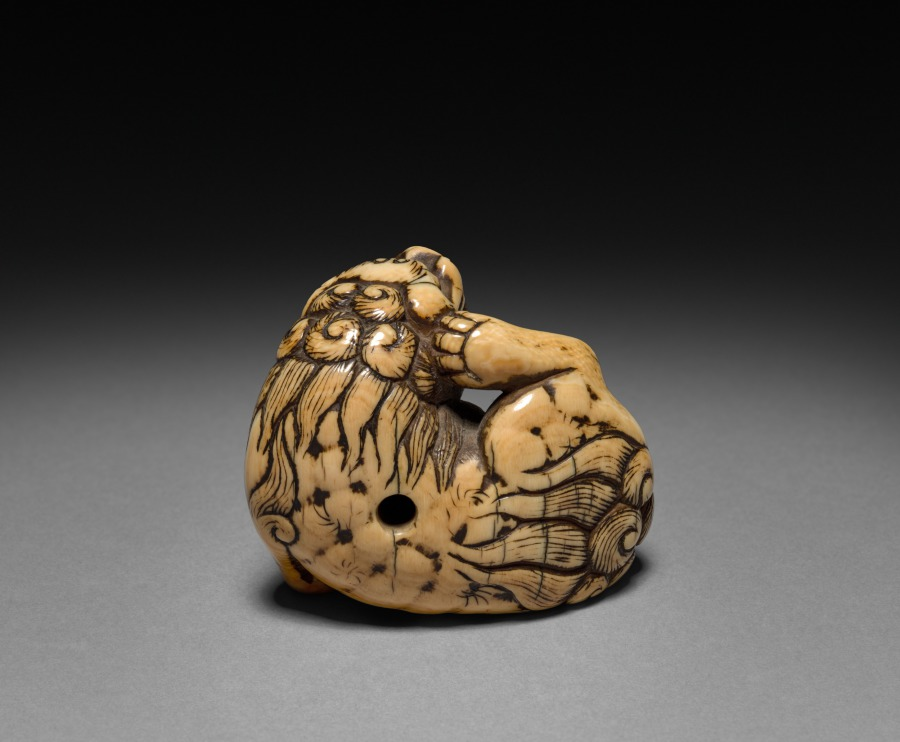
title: Chinese Lion with Ball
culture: Japan, Meiji period (1868–1912)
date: early 1900s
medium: ivory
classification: Netsuke